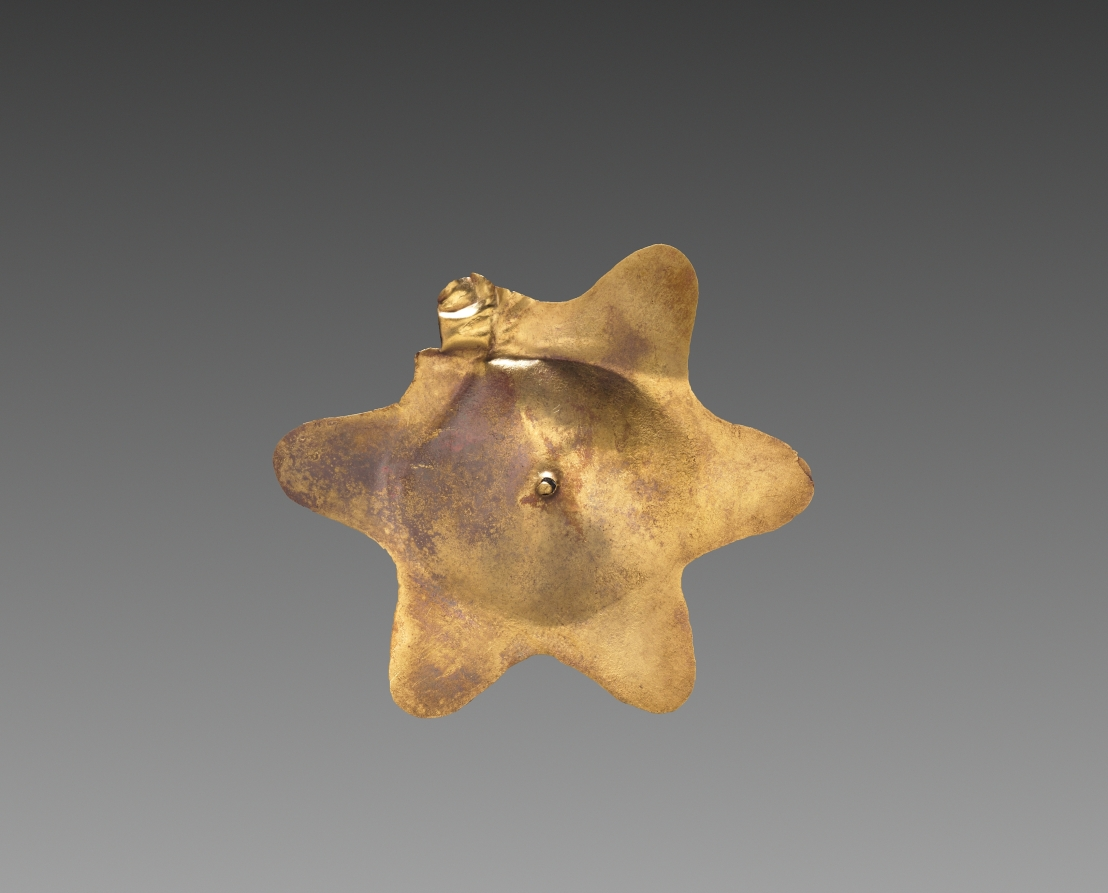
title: Headdress Ornament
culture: Peru, South Coast, Paracas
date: c. 300 BCE–200 CE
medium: hammered and embossed gold-copper alloy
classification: Jewelry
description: A similar star-shaped metal ornament is present on a human-hair wig from a mummy excavated at the Paracas Necropolis site. The wig has tresses wrapped with colored yarns, and a long headband wrapped many times around the head. The star-shaped ornament is attached to the headband, and a circular metal ornament is attached to the braid.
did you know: Tumbaga is an alloy made by blending gold with copper, which may give the gold a rosy hue.